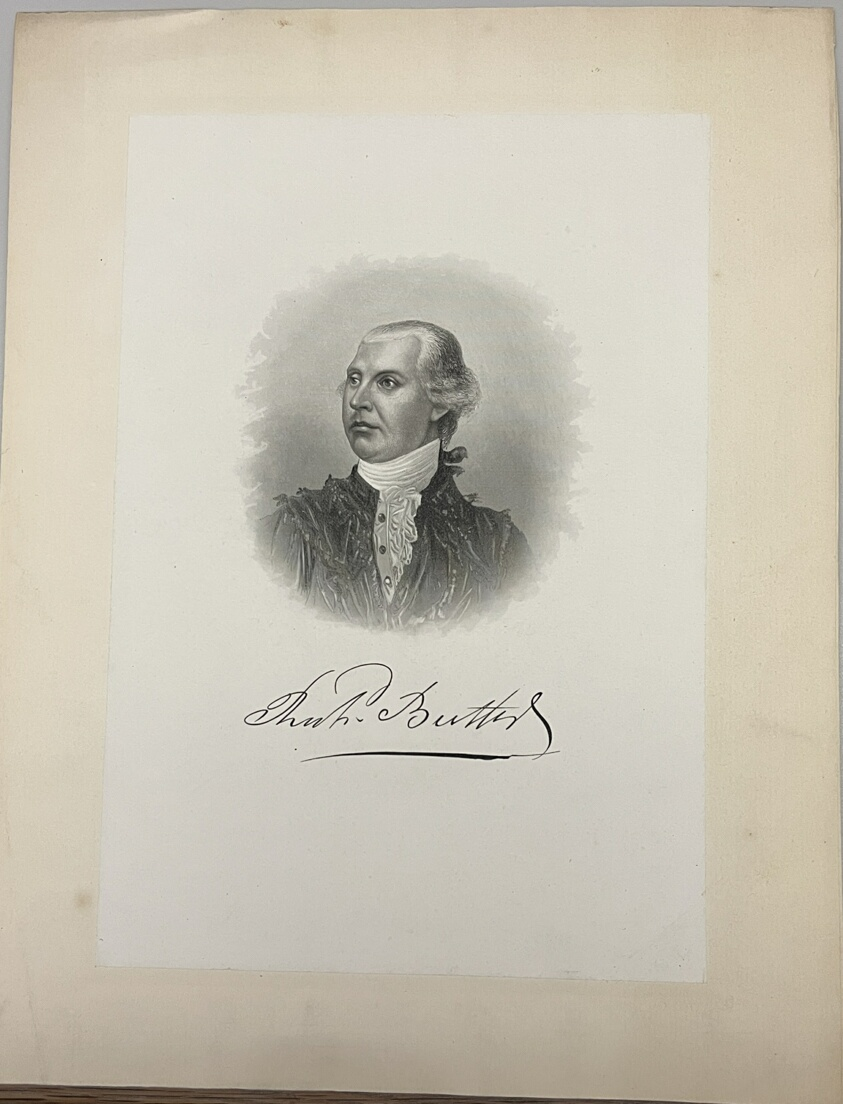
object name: Print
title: Thomas Buttters[?]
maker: Artist Unknown (Likely American, 19th century)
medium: Stipple engraving and etching on ivory paper, laid down on cream paper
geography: United States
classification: reproduction; print; prints and drawing